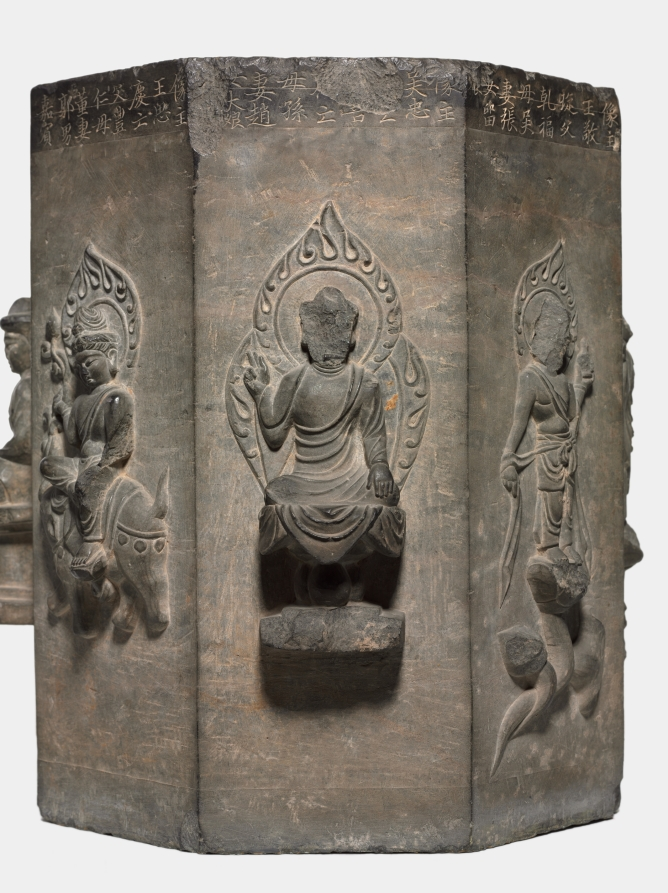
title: Section of a Dharani Pillar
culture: China, Tang dynasty (618-907)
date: 618–907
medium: limestone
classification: Sculpture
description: This octagonal stone pillar, with Buddhist figures carved on its eight sides, is part of a dharani pillar commissioned by Buddhist believers to pay tribute to the dead. The eight inscriptions seen here are eulogies dedicated by eight families to their deceased family members. Dharanis were a form of spell in Esoteric Buddhism said to possess supernatural power when being recited or carried and were incorporated into sutras, such as the Buddha Usnisa Vijaya Dharani Sutra. Dharani pillars, also called sutra pillars, became the dominant bearers of Usnisa Vijaya Dharani which supposedly helped sentient beings prolong life and destroy hardships of the eternal cycle of life and the realms of hell.